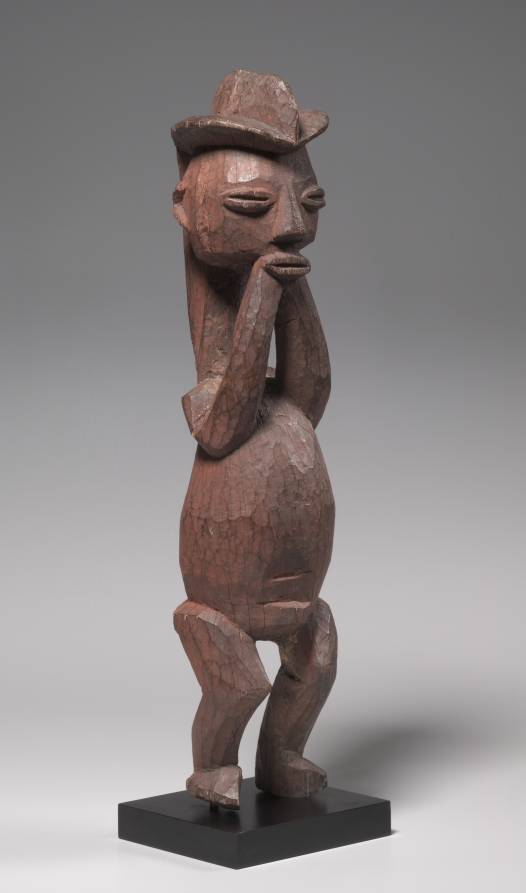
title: Male Figure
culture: Africa, Central Africa, Democratic Republic of Congo, Hungaan-style maker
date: mid- to late 1800s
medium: Wood and colorant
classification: Sculpture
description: Hungaan figures of this size served as guardians of ritual shrines and functioned in rituals to promote fertility, guarantee well-being, and ensure longevity. The striking crested hairstyle imitates a real coiffure or a wig, indicative of status and prestige. The hands supporting the chin identify the figure as a chief who is immersed in thought and contemplation, pondering over his responsibilities.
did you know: The red powdery surface of this figure mimics a red body adornment that mixed ground camwood with palm oil.